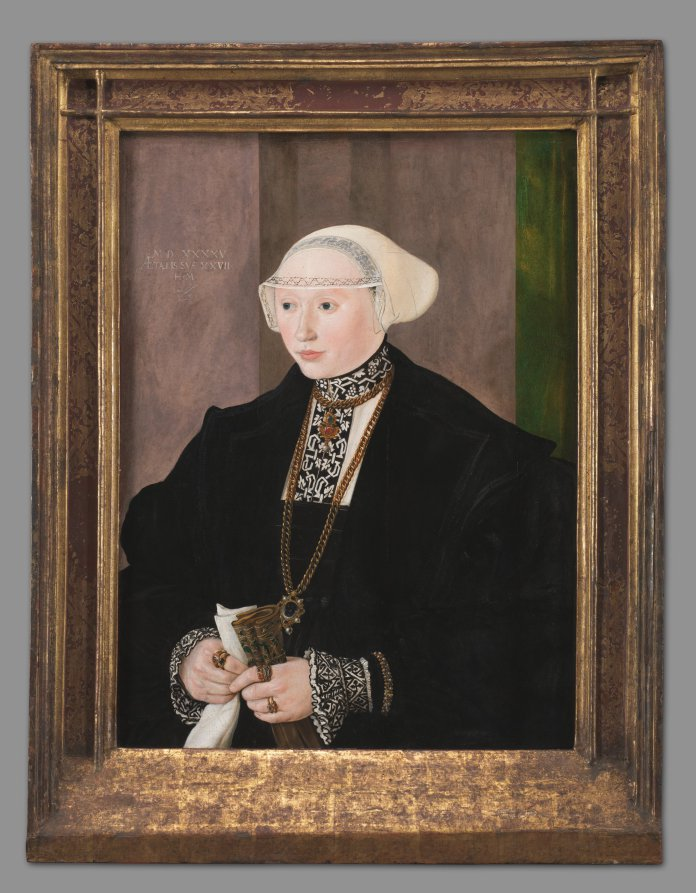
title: Portrait of Maria Kitscher, Frau von Freyberg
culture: Germany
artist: Hans Mielich (German, 1516–1573)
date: 1545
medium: oil on wood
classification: Painting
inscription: Signed upper left: "M.D. XXXXV. / AETATIS SUAE XXVII. / .H.M."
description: Maria von Freyberg was in the court of Albert V, Duke of Bavaria. However, as Lutherans, the family eventually fell from favor as Catholic political interests consolidated power in Bavaria. Mielich’s work for the Munich court included illustrating an inventory of the duchess’s jewelry, seen in the meticulous attention here to the sitter’s brooches, necklaces, and rings. The diamond and ruby ring on her left index finger would have slid apart to reveal a private message or image underneath the gems.